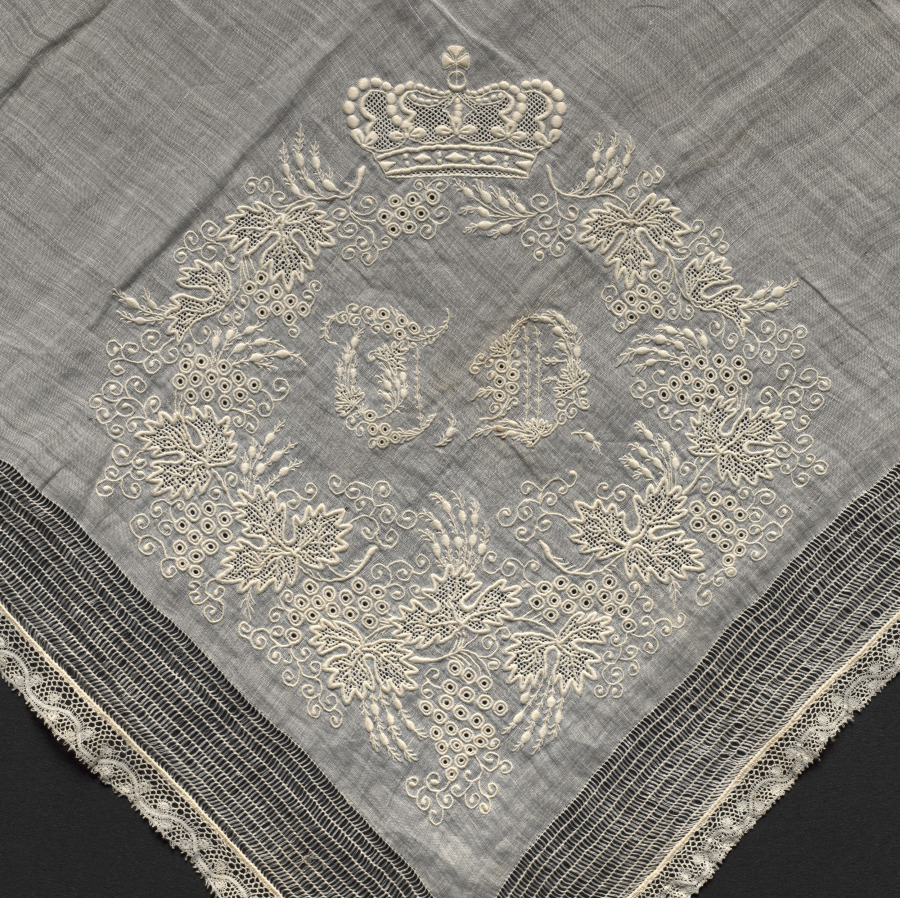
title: Lace Handkerchief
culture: France(?)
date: 1700s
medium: Plain weave linen ground; needle lace (drawnwork), bobbin lace (Valenciennes lace) edging and embroidery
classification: Embroidery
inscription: white linen embroidery in one corner: "TD."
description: In one corner of this lace handkerchief is white-on-white embroidery depicting a crown with the initials T D below it.